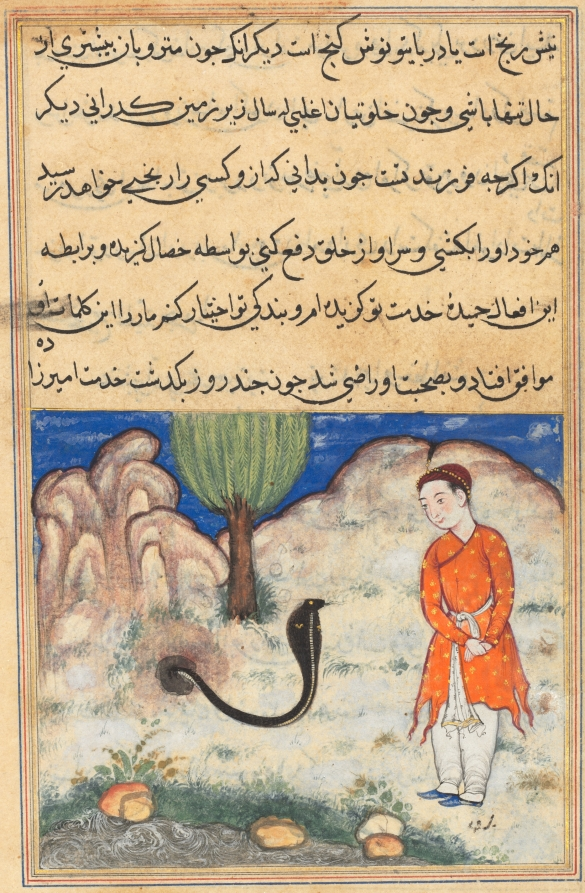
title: The prince, a son of the ruler of Sistan, enters the service of a snake, from a Tuti-nama (Tales of a Parrot): Thirty-seventh Night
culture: Mughal India, court of Akbar (reigned 1556–1605)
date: c. 1560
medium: gum tempera, ink, and gold on paper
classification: Painting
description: A black snake rises from a hole to greet the prince of Sistan, in southeastern Iran. The prince, who had been wandering destitute through the wilderness has made a vow to serve the next living creature he meets. Although the snake is initially skeptical, he agrees to the arrangement and the prince is ultimately rewarded for his loyalty.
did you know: The snake is depicted as a cobra.